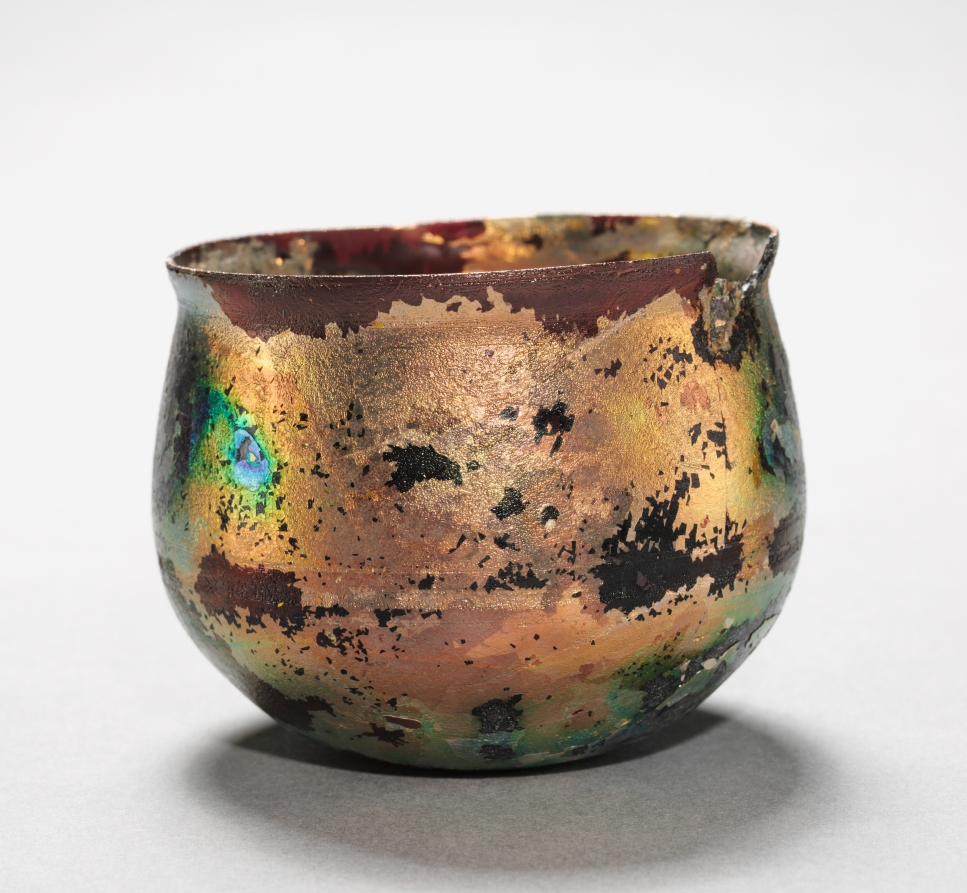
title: Goblet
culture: Italy, Roman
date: 100–300 CE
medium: glass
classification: Glass